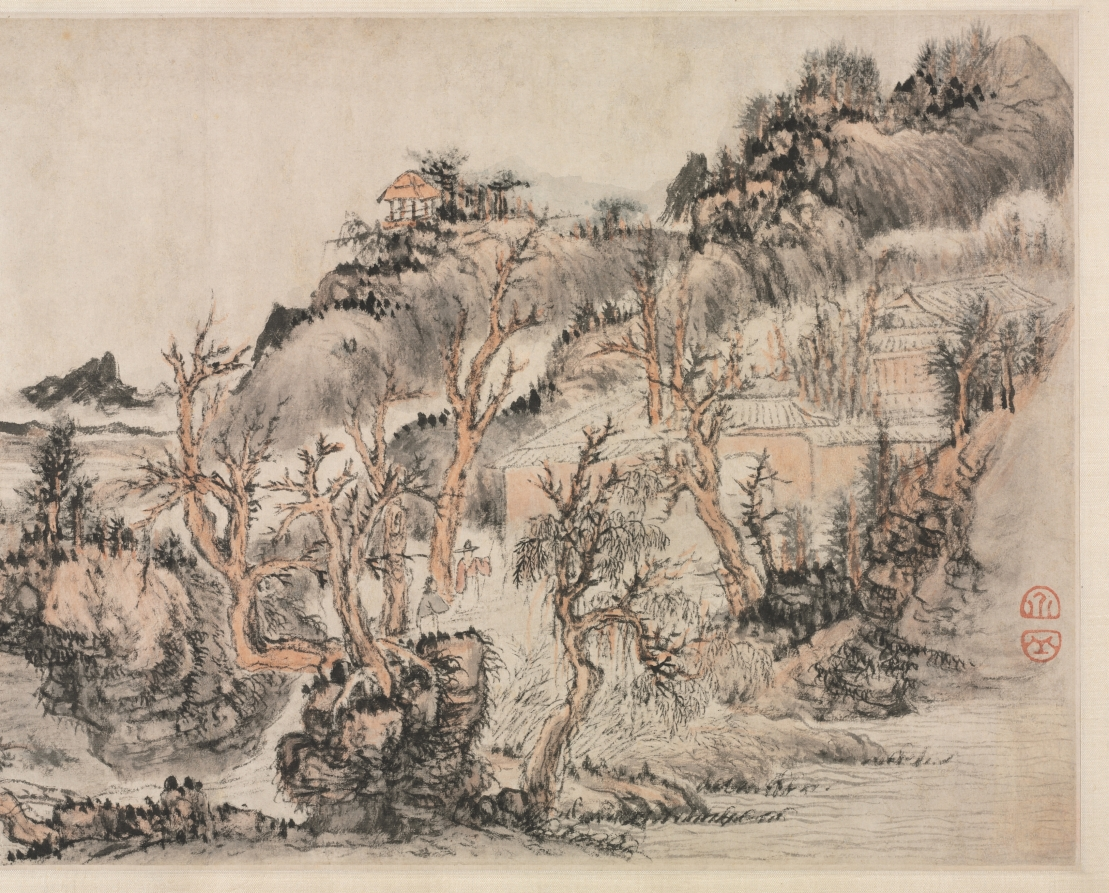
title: Spring Landscape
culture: China, Qing dynasty (1644–1911)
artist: Kuncan (Chinese, 1612–c. 1673)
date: 1666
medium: double album leaf mounted as a handscroll; ink and color on paper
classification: Painting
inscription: 遊山忘歲月，屐舄自相過。 風露寒虚意，禪機靜裡磨。 同年叩梵宇，遂此老煙蘿。 豈向人間說，林丘自在多。 畫必師古，書亦如之。觀人亦然，况六法乎。石谿殘道人 印二：石谿，白秃。另有「介丘」一印在右邊。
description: One of the acclaimed "Four Monks" (the other three being Zhu Da, Daoji, and Hongren), Kuncan was known for the rough and rustic style of his landscape paintings. This painting was once part of a large album, painted at the request of his friend Cheng Zhengkui (active 1630–74), with whom he shared a common interest in painting and poetry. The inscription contains a poem, which reads: Wandering through mountains and oblivious of time, We met in casual shoes (and attires). The wind and dew drops harbor a chilling emptiness. Only with patience and silence can the Chan inspiration come. . . .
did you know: This spring scene was once accompanied by album leaves of summer (now in the Museum für Asiatiche Kunst, Berlin) and autumn and winter (now in the British Museum).